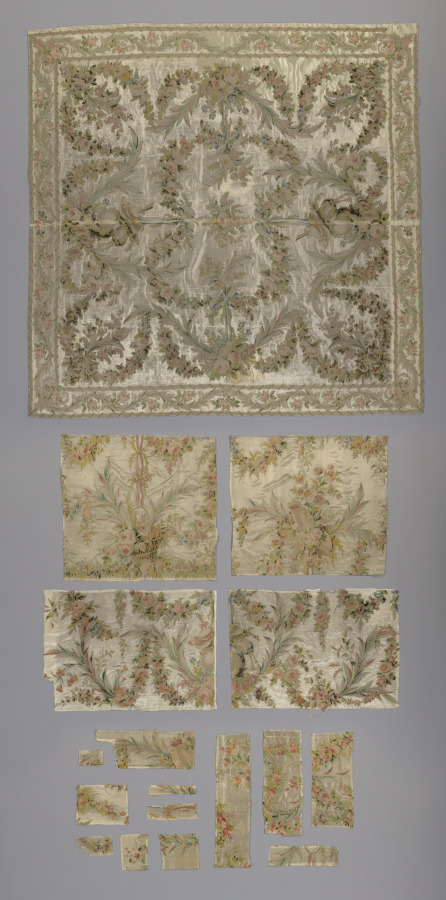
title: Coverlet and Fragments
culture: France, 18th Century, period of Louis XVI (1774-1793)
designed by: Philippe de Lasalle (French, 1723–1805)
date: c. 1760–1770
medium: embroidered satin and silk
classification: Textile